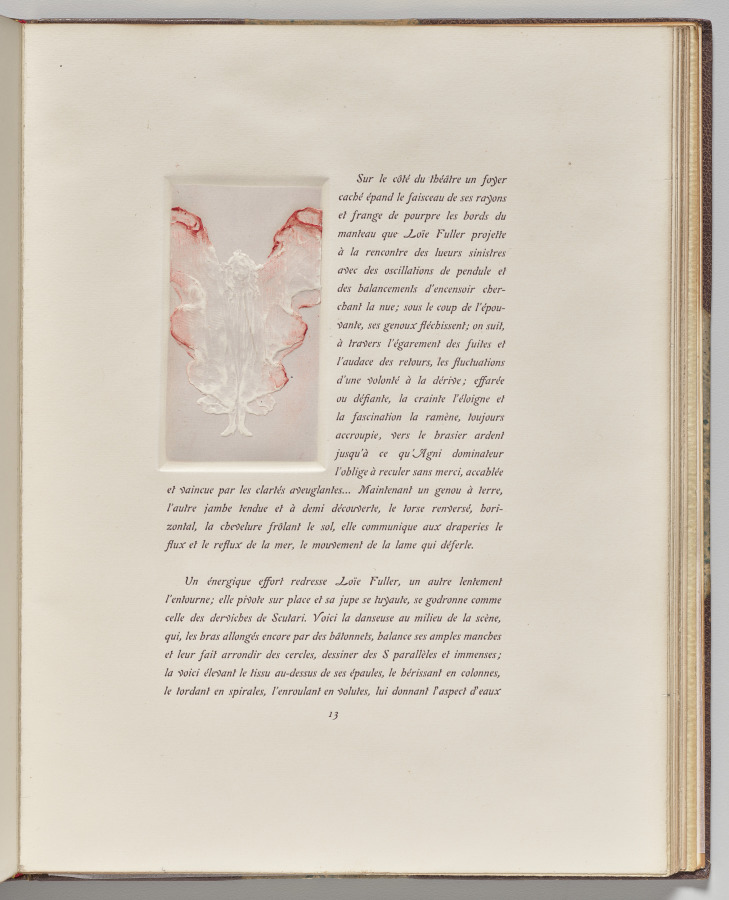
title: Dancing Woman with Arms Raised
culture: France, early 20th Century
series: La Loïe Fuller, by Roger Marx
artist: Pierre Roche (French, 1855–1922)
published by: Les Cents Bibliophiles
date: 1904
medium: gypsograph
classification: Bound Volume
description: Although best known as a sculptor, Roche was a versatile and prolific artist who worked in many mediums. Loïe Fuller, the pioneer of modern dance who took Paris by storm in 1892, was one of his favorite subjects. He portrayed her in clay, bronze, marble, plaster, and in a series of gypsographs that illustrated an essay by the art critic Roger Marx. The book was described as "a precious monument to Loïe Fuller."